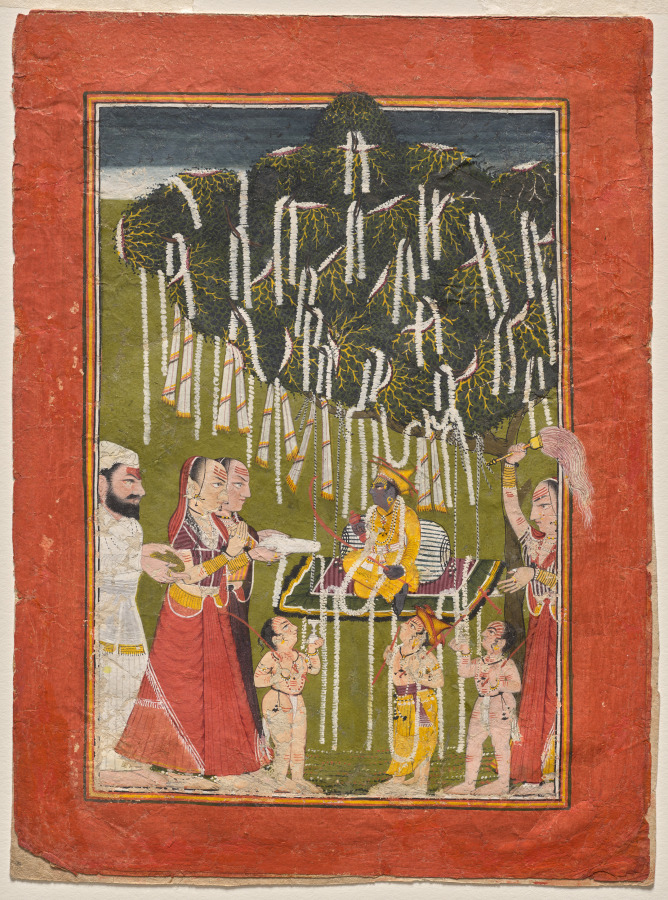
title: Adoration of young Krishna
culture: Northern India, Pahari kingdoms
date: c. 1720–25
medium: gum tempera on paper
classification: Painting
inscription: Number ‘30’ on the verso, Takri Number ‘34/4638’ on the leaflet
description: The painting shows Krishna being worshipped under a pipal tree by a group of Shaivite devotees, recognized by the horizontal marks on their foreheads. Krishna is clad in a yellow Mughal jama, or belted Central Asian tunic, instead of the wrapped Indian lower garment (dhoti) traditionally associated with Krishna. The tree has been decorated with garlands and scarves to attract auspicious and divine benevolence.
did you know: Krishna is holding a rattle in his right hand.